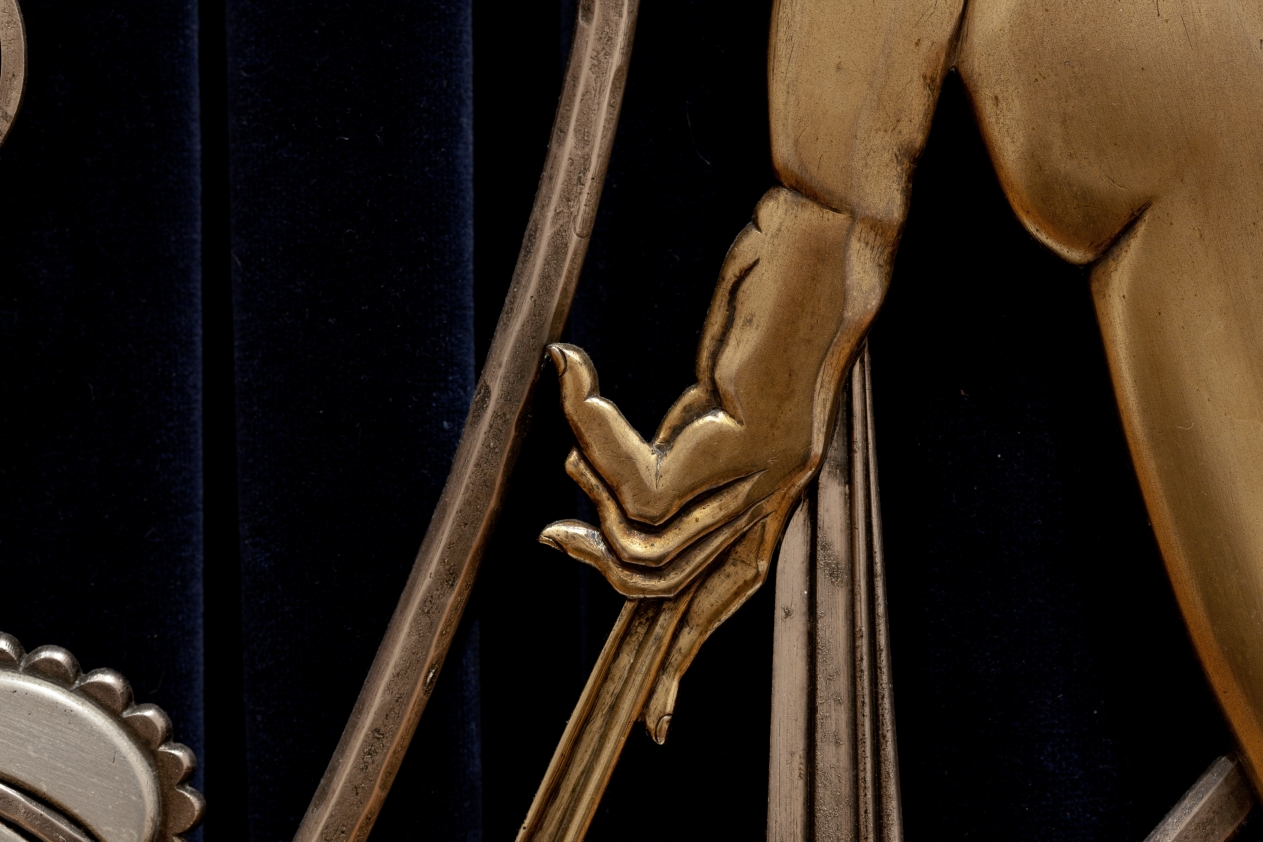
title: Muse with Violin Screen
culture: America, Ohio, Cleveland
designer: Paul Fehér (American, born Hungary, 1898–1990)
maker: Rose Iron Works (America, Ohio, Cleveland, est. 1904)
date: 1930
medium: Steel, brass; silver and gold plating, cotton velveteen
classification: Metalwork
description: Since the early years of the 20th century, the Rose Iron Works, a Cleveland supplier of architectural ornament, has produced distinguished metalwork. The company’s founder, Martin Rose, was born in Austria-Hungary and studied ornamental metalsmithing in Vienna prior to immigrating to Cleveland in 1902. In the 1920s, he hired a talented young Parisian designer, Paul Fehér, to work for the firm. Fehér’s designs, culminating in this massive screen, brought a modern European sensibility to the Rose Iron Works production. With its geometric patterning, highly stylized and abstracted natural forms, and the central figure reminiscent of the celebrated jazz singer Josephine Baker, this screen reflects the classic motifs of Art Deco design.